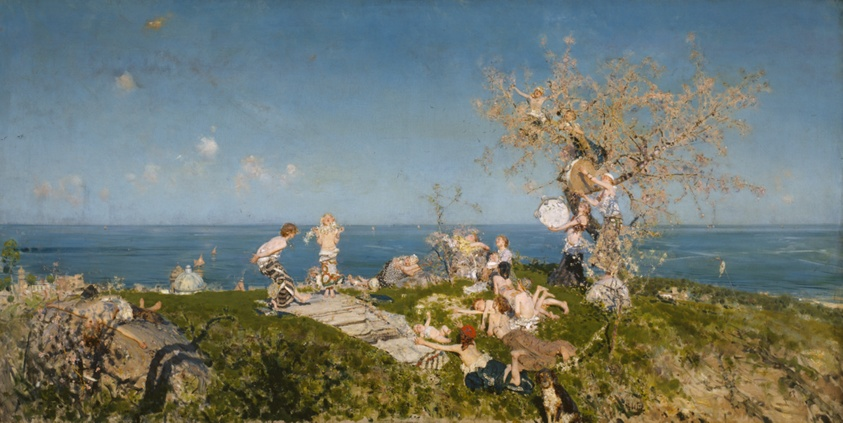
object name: Painting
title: Springtime and Love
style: nineteenth century, 19th century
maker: Francesco Paolo Michetti (Italian, 1851–1929)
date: 1878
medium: Oil on canvas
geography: Italy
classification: painting; paint; oil paintings (visual works); oil on canvas; Italian; european painting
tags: children, music, musical instruments, trees, seasons, dog, dogs, animals, boys, girls, leisure, rocks, sleep, babies, flowers, flora, water, ocean, boats, sky